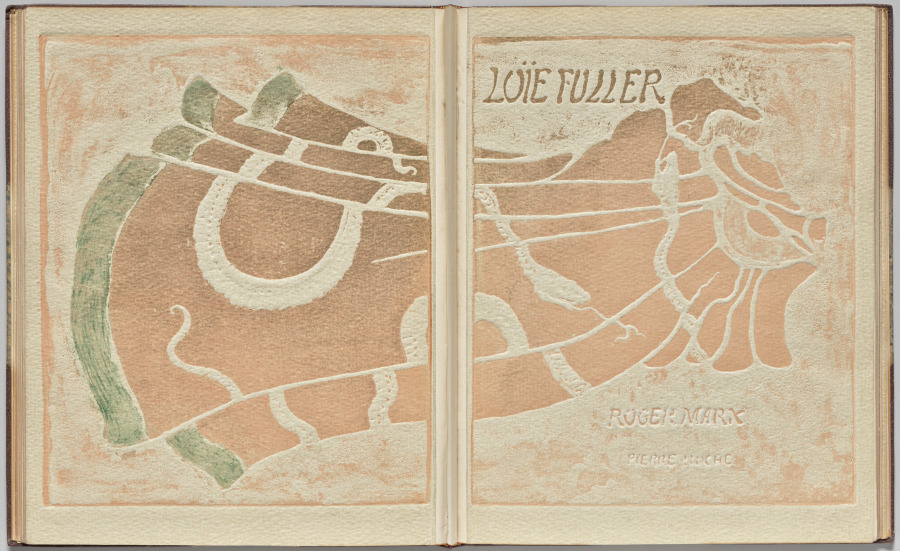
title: Frontispiece/ Title Page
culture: France, early 20th Century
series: La Loïe Fuller, by Roger Marx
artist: Pierre Roche (French, 1855–1922)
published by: Les Cents Bibliophiles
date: 1904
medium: gypsograph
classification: Bound Volume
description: Although best known as a sculptor, Roche was a versatile and prolific artist who worked in many mediums. Loïe Fuller, the pioneer of modern dance who took Paris by storm in 1892, was one of his favorite subjects. He portrayed her in clay, bronze, marble, plaster, and in a series of gypsographs that illustrated an essay by the art critic Roger Marx. The book was described as "a precious monument to Loïe Fuller."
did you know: Roger Marx, the author of the essay contained in this book, was among the most prominent critics, curators, and collectors of late 19th-century Paris.